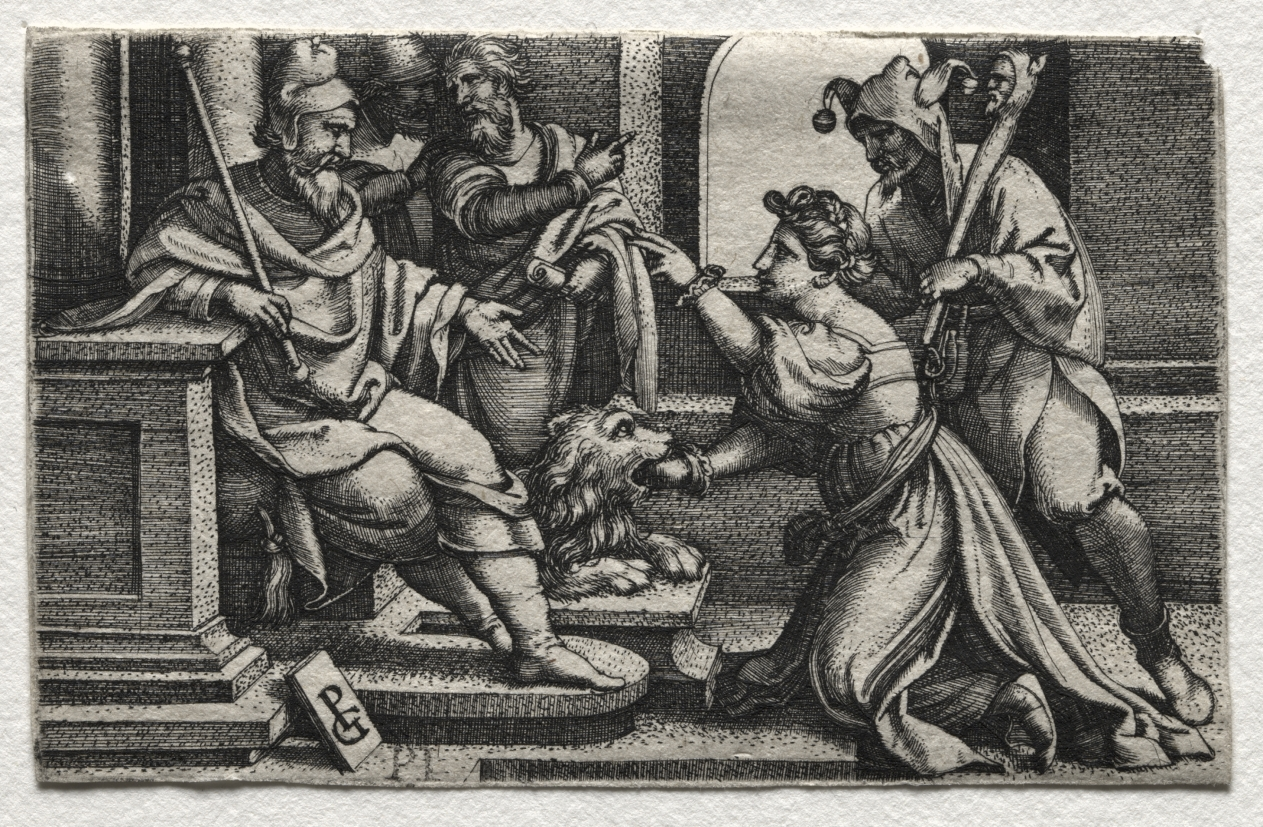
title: The Mouth of Truth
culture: Germany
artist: Georg Pencz (German, c. 1500–1550)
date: c. 1533–34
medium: engraving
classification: Print